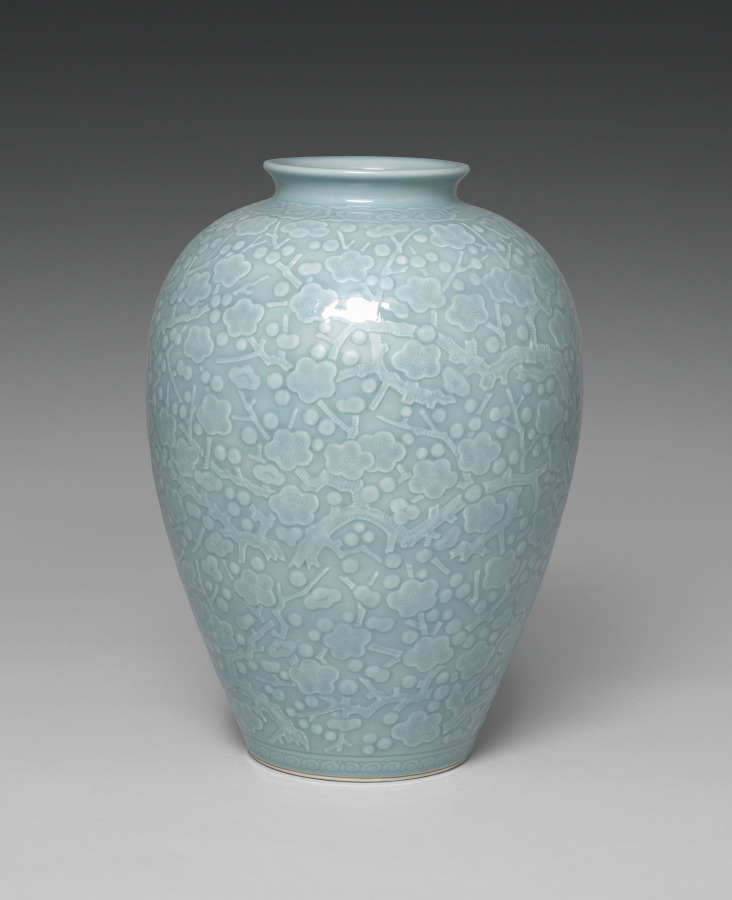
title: Vase with Plum Blossoms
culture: Japan, Taishō period (1912–26) or Shōwa period (1926–89)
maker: Seifū Yohei IV (Japanese, 1872–1951)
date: 1914–46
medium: Glazed porcelain with molded and carved design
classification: Ceramic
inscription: 清風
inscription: "James & Christine Heusinger/ Japanese Art Collection"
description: Although inspired by representations of flowering plum, or prunus, in Chinese ceramics, the dense allover design of branches on this vase also resembles Japanese textile patterns. As they might on a kimono, the trunks run in alternate directions up and down the surface. At the foot, or bottom of the vase, is a classic band of spirals, and at the neck, or narrowed portion near the opening, is a collar of clouds.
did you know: Yohei IV’s allover design of budding and flowering plum blossoms, strongly associated with spring and with China, is combined with his father’s “water color” glaze on this vase.